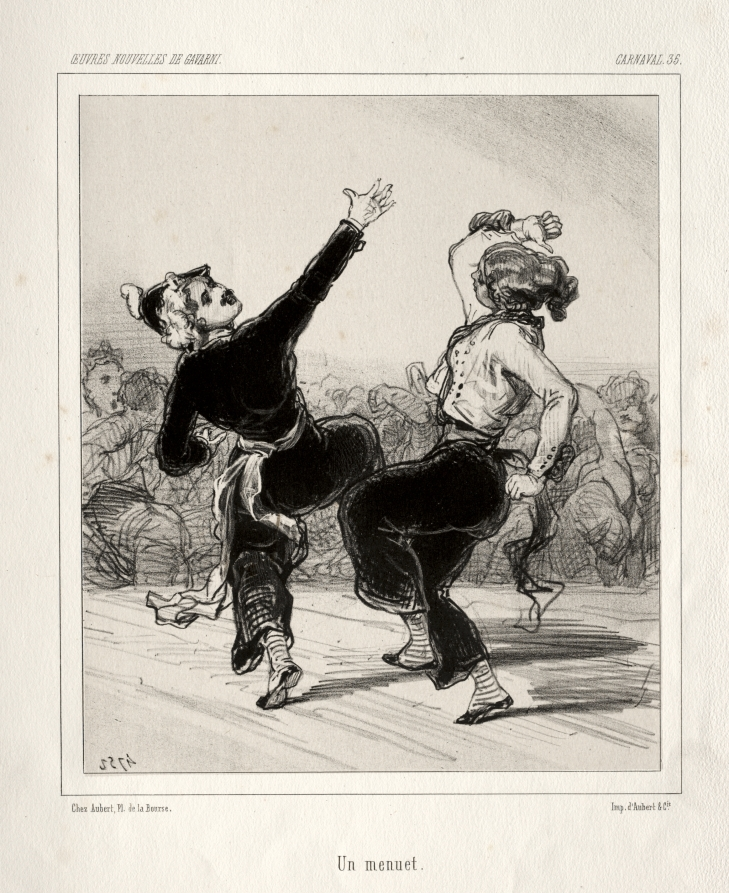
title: Carnaval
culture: France, 19th century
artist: Paul Gavarni (French, 1804–1866)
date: c. 1841–47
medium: lithograph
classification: Print